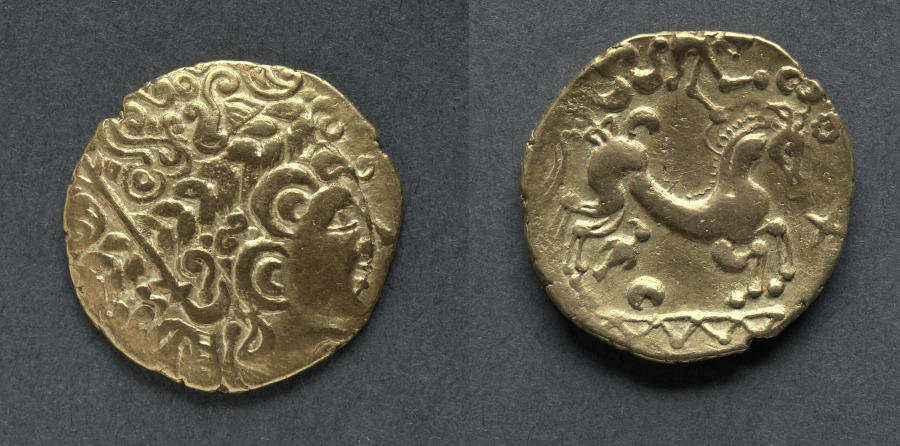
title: Stater: Head (obverse); Horse with Victory (reverse)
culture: England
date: c. 125–100 BCE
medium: gold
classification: Coins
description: Like many other pieces in the ancient British series of staters, those of the Bellovaci, which were struck on the mainland of Europe and in Britain, take their type from the gold staters of Philip II of Macedon (359–336 BC). This original coin was copied and recopied over a long period of time, the copies becoming on occasion very crude pieces. The head on the piece shown is a run-down form of the head of Philip while the reverse is all that is left of the chariot of Apollo, the Sun God, and its driver.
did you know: The Bellovaci were a Belgic tribe located near the present-day city of Beauvais, France, during the Iron Age and the Roman period.